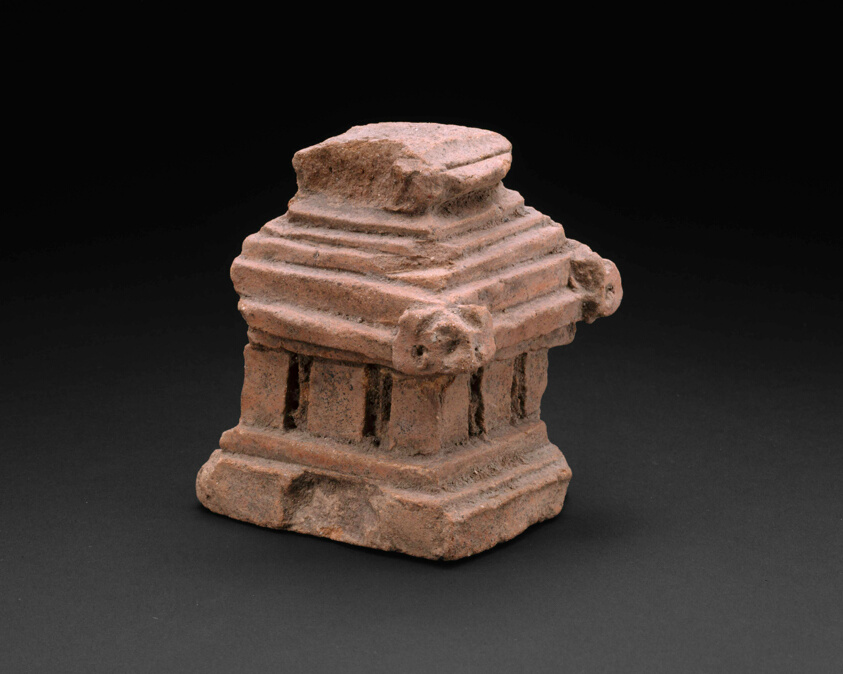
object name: Sculpture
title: Fragment of an Architectural Model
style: Southeast Asian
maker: Indonesia; Eastern Java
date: 14th/15th century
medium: Terracotta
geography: Eastern Java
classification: ceramics; shrine; asian art; sculpture